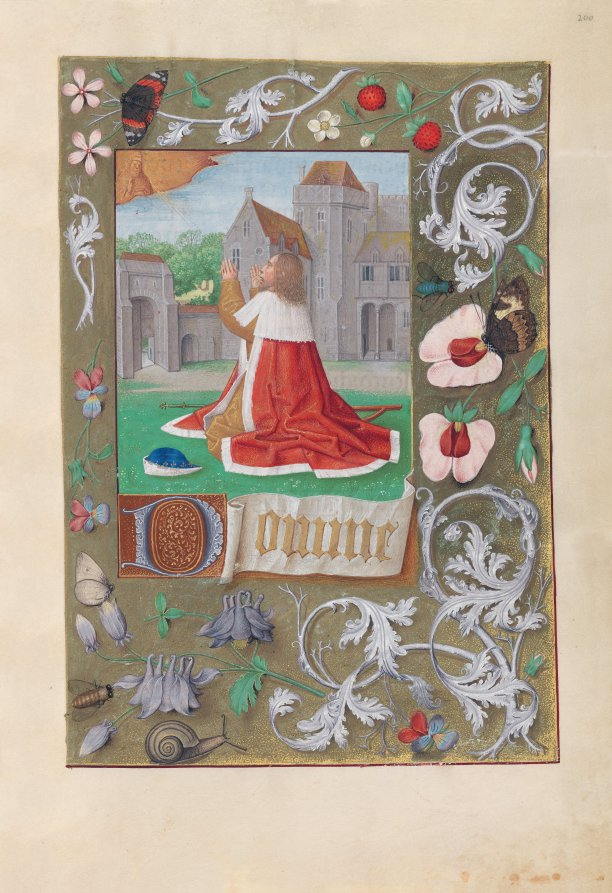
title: Hours of Queen Isabella the Catholic, Queen of Spain: Fol. 200r, David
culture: Flanders, Ghent and Bruges, late 15th century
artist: Master of the First Prayerbook of Maximillian (Flemish, c. 1444–1519)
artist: and Associates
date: c. 1500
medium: ink, tempera, and gold on vellum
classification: Bound Volume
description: This manuscript was illuminated by a circle of at least five highly organized manuscript painters active in the Flemish cities of Ghent and Bruges. The principal illuminator was Alexander Bening, who painted the majority of the book's miniatures. Manuscripts produced by this circle of artists are renowned for the decoration of their borders, which typically feature a rich variety of realistically-painted flowers, birds, and butterflies. This prayer book, called a book of hours, was intended not for a cleric, but for the private devotions of a lay person-in this case, Isabella the Catholic, Queen of Spain (1451-1504). Isabella's coat of arms embellishes the book's frontispiece. It is unlikely that the book was commissioned by the Queen herself; rather, she probably received it as a diplomatic gift from someone courting her patronage, perhaps Cardinal Francisco Jimenez de Cisneros. A Franciscan friar, Jimenez was dependent upon Isabella for his advancement, first to the post of Queen's confessor in 1492, and then to Archbishop of Toledo in 1495.